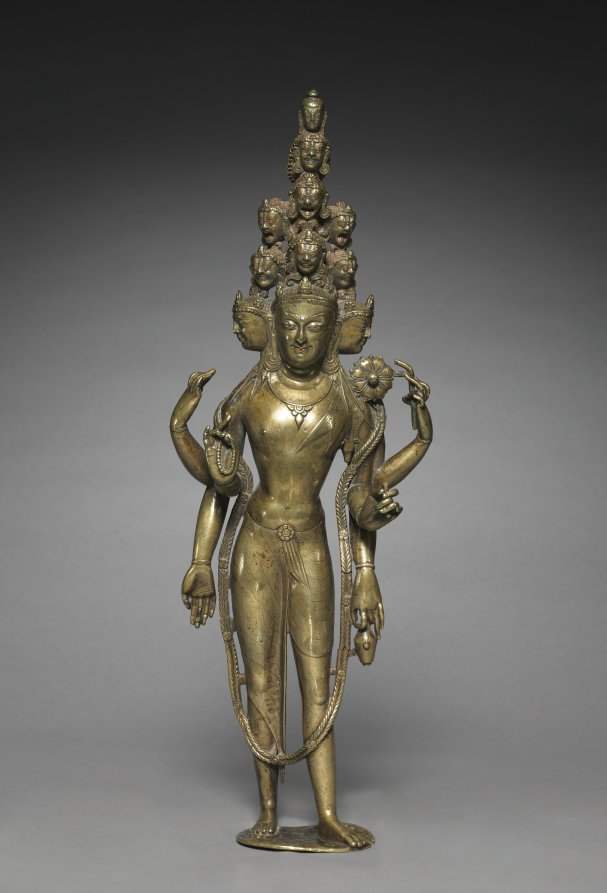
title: Eleven-Headed Bodhisattva of Compassion (Avalokiteshvara)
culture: Western Himalayas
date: around 1000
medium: gilt bronze with silver and copper inlay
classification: Sculpture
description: One of the finest surviving examples of its kind, this rare six-armed form of Avalokiteshvara has the slender athletic figure and penetrating expression associated with the art of Kashmir, the main source for western Tibetan styles. This Bodhisattva combines the qualities of a prince and an ascetic, with his crown and jewels combined with the yogi's antelope skin over his left shoulder and prayer beads in his middle right hand. Representing the range of Avalokiteshvara's forms and aspects, his eleven heads are remarkably articulated with individualized features. They follow textual descriptions that describe his three placid faces, three fierce faces, three terrifying howling faces, and one laughing face, all surmounted by a head of the Buddha Amitabha, with whom he is closely associated. Tongues and lips have been inlaid with copper to extraordinary effect, and a miniature seated figure of Amitabha Buddha has been placed in the center of every crown.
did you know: The bottle in his lower-left hand contains the nectar of immortality.